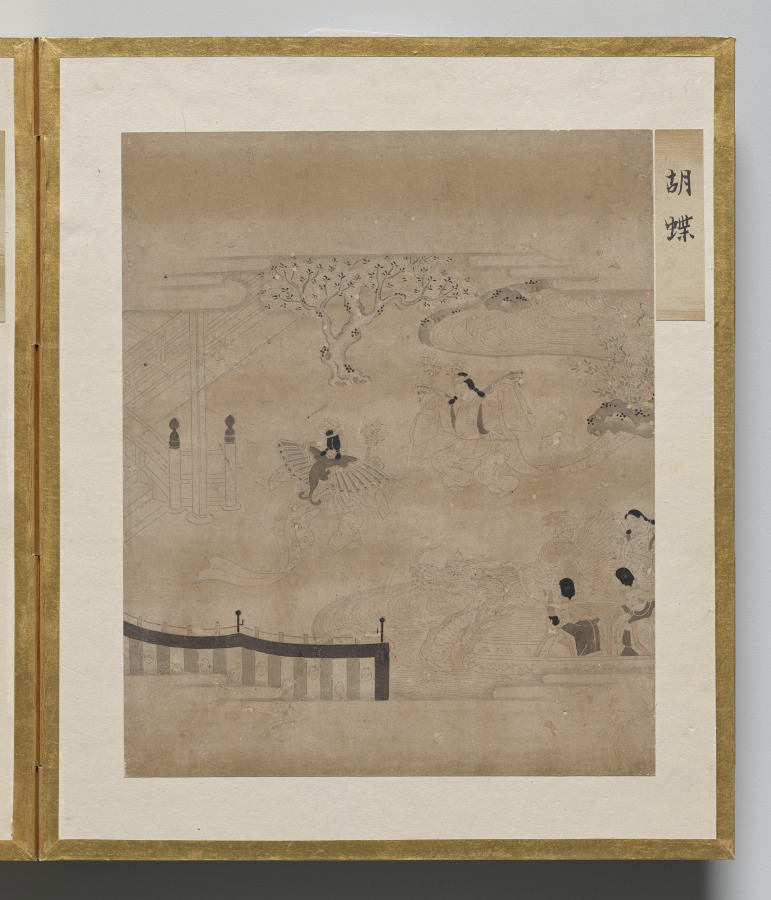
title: Butterflies from Album of Illustrations for the Tale of Genji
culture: Japan, Edo period (1615–1868)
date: 1600s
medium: painting in an accordion-style album; ink, light color, and gold on paper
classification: Bound Volume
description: This album contains illustrations for the classic literary work the Tale of Genji, authored in the 1000s by Murasaki Shikibu, an aristocrat of the Heian period (794–1185) court. The scenes are painted in the “white drawing” (hakubyō) mode, in which a fine ink line is used to depict figures and spaces with great subtlety, punctuated only occasionally by traces of red pigment for a character’s lips, a detail of a garment, or a decorative element. These two scenes illustrate episodes from the chapters “Thin Veil of Cloud” (Usugumo) and “Barrier Gate” (Sekiya).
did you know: The illustrations are identified by chapter title in cartouches to the upper right of the paintings.